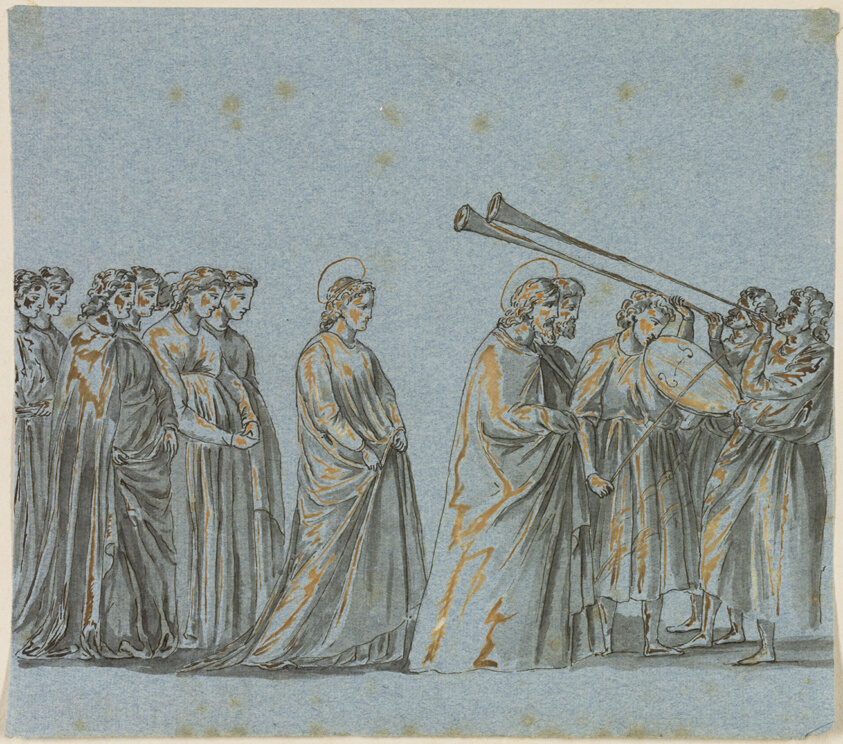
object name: Drawing and Watercolor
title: Wedding Procession of Mary and Joseph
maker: Giotto, after; Italian, 1266/1267?-1336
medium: Pen and brown ink, with brush and gray wash, heightened with lead white (oxidized), on blue laid paper, tipped on to cream wove card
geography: Italy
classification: ink with wash; drawings (visual works); prints and drawing